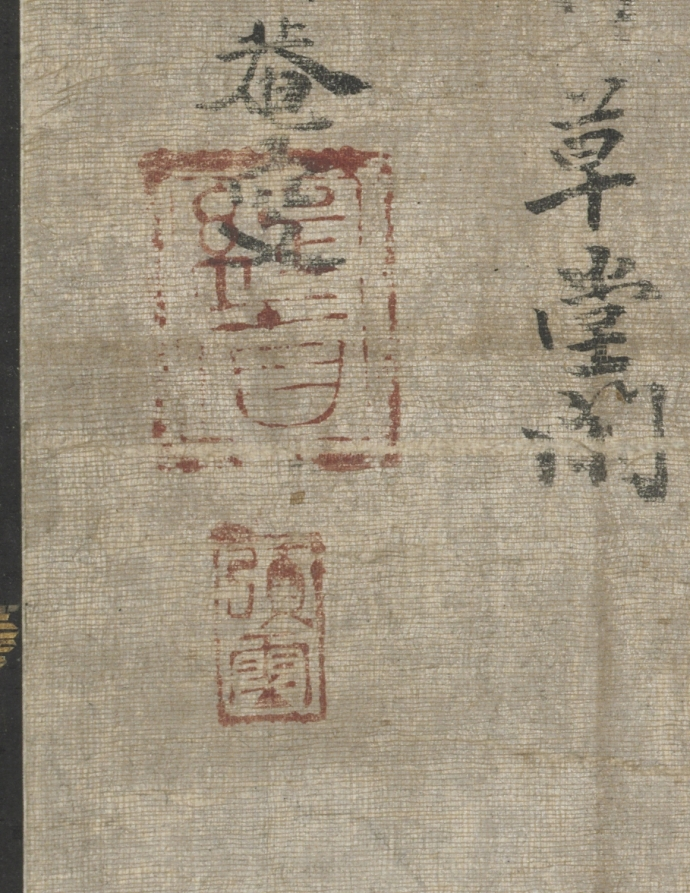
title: Landscape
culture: Japan, Edo period (1615–1868)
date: 1700s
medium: hanging scroll; ink and color on silk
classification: Painting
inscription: four inscriptions (one dated to 1414) by Japanese monks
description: This composition was fashioned after works created by Zen clerics of the Muromachi period (1392–1573), who often added their original Chinese-style poems above an ink painting to make a hanging scroll called a shigajiku. The poems here quote from essays on Sima Guang (1019–1086) by the Chinese Song dynasty literatus Su Shi (1037–1101). They interpret the studio surrounded with bamboo as a metaphor for the garden of Sima, the Song dynasty scholar-official who, in imitation of the Tang poet Bai Juyi, enjoyed the garden in isolation during his exile in Luoyang.